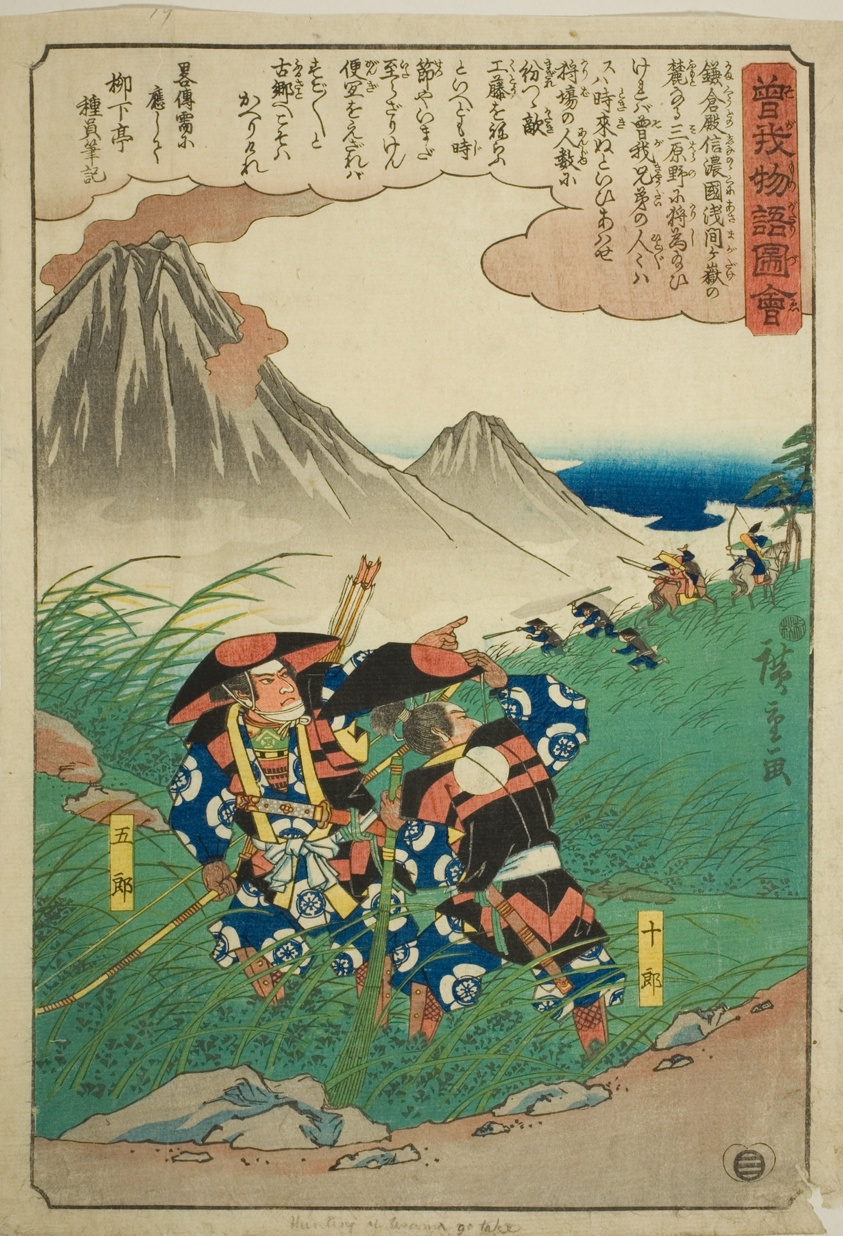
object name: Print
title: Soga no Juro and Soga no Goro pursuing Suketsune's hunting party at Miharano, from the series "Illustrated Tale of the Soga Brothers (Soga monogatari zue)"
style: Japanese (culture or style)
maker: Utagawa Hiroshige 歌川 広重; Japanese, 1797-1858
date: c. 1843/47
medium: Color woodblock print; oban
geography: Japan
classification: woodblock print; print; asian art